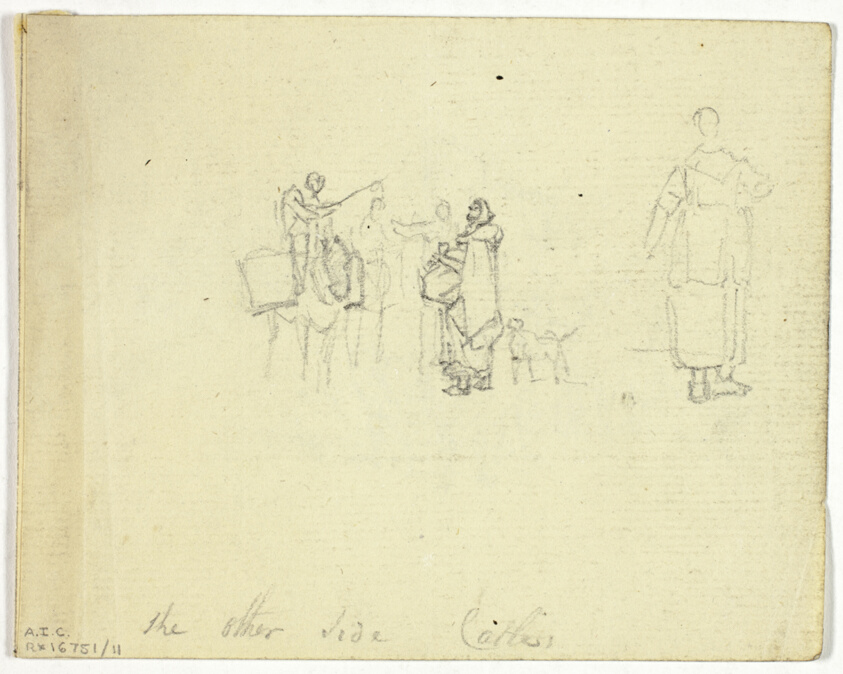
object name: Drawing and Watercolor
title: Cattle (recto); The Charlatan (verso)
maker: William Henry Pyne (English, 1769-1843)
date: n.d. (recto); 1789/1843 (verso)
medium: Graphite (recto and verso) on ivory laid paper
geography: England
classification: graphite; drawings (visual works); prints and drawing